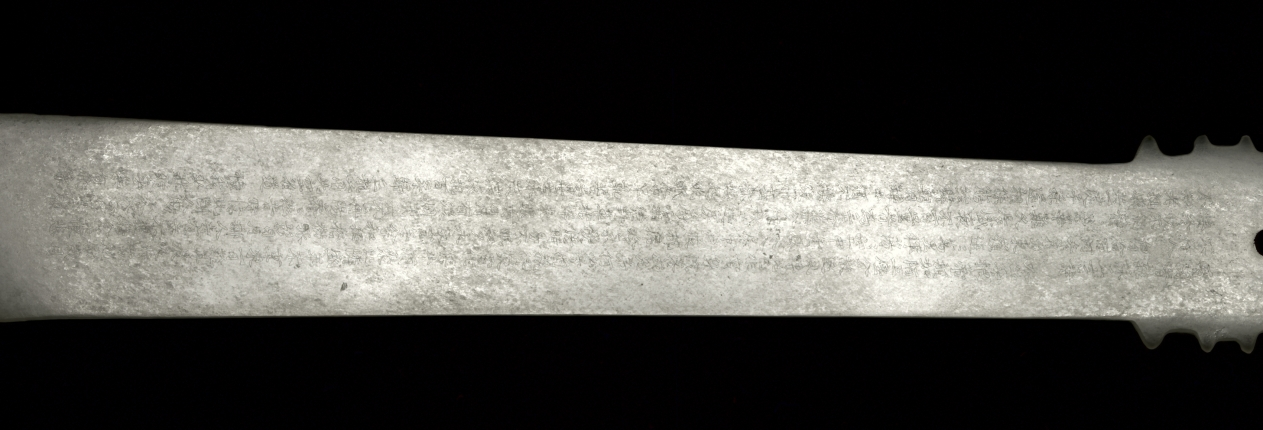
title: Scepter (Gui) with Miscellaneous Poems by Tao Qian (365–427 CE)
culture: China, Possibly Qing dynasty (1644-1911), Qianlong period (1736-1795)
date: 1122 or later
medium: translucent white jade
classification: Jade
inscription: "Respectfully made by the jade works of the palace work bureau, on an auspicious day in the twelfth month of the winter, in the third year of Xuanhe of the Imperial Song (Dynasty)" (1121). On the front and back of the knife are engraved, in minute characters with double contour lines, eight complete poems entitled "Miscellaneous Thoughts" by Tao Yuanming (365–427 CE), one of the greatest early poets of China. Here are two examples: The bright sun sinks beyond the western ridge,/ The white moon rises behind the eastern range./ Afar, afar a myriad miles it flashes,/ Immeasurably vast its light amidst the sky./ A wind comes and enters the bedroom door,/ So in the night pillow-and mat are cold./ The air seems different- - I awake to the season's change./ I cannot go to sleep and know the night's eternity,/ I wish to speak but there is no friend to talk to./ Raising my cup I challenge my lonely shadow./ The days and months fling us aside and pass;/ We have high purposes but cannot realize them./ Thinking of this I have grief and pain at heart,/ And all night long can find no quietness./ It is hard to dwell long in prosperity;/ Rise and decline cannot be reckoned on./ What were formerly lotus buds in May,/ Now in the autumn are but withered seed-pods./ A heavy frost stiffens the prairie grasses- - / They wilt despondently and do not quickly die.-/ The sun and moon come ever circling back./ Once we depart we do not shine again./ I ponder deeply on times long past and gone/ Though to remember them tears my very entrails.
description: This piece derives its shape from the ancient jade scepter known as gui. On both sides of the jade surfaces are the inscribed texts "Miscellaneous Five-Character Poems by the Jin Poet Tao Qian" engraved in minuscule characters, with a reference indicating that the piece was made by the jade workshop of the Xiuneisi Office in 1122 of the Xuanhe reign. This Northern Song attribution is, nevertheless, questionable.